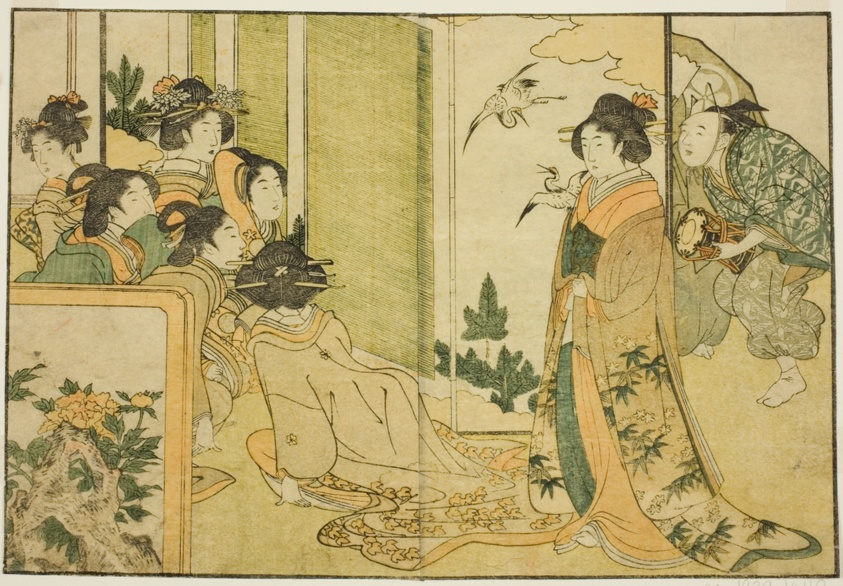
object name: Print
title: New Year Manzai Performance at a Feudal Lord's Mansion, from the illustrated book "Picture Book: Flowers of the Four Seasons (Ehon shiki no hana)," vol. 1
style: Japanese (culture or style)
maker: Kitagawa Utamaro 喜多川 歌麿; Japanese, 1753 (?)-1806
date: New Year, 1801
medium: Color woodblock print; double-page illustration from book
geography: Japan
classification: woodblock print; print; asian art